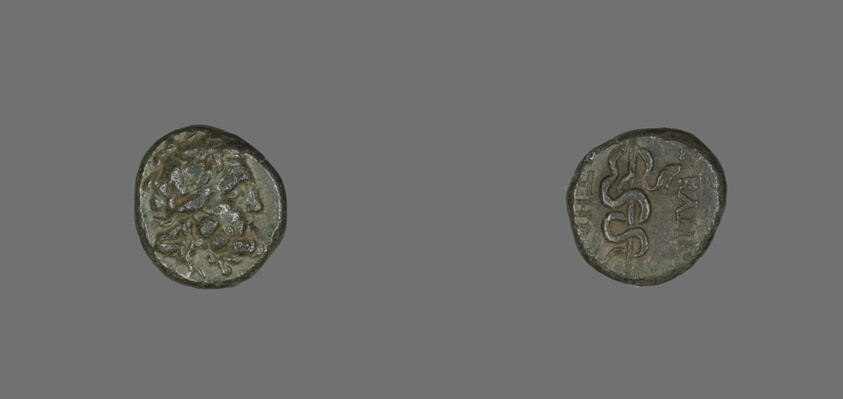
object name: Coin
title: Coin Depicting the God Asklepios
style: greek, ancient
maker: Greek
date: about 200-133 BCE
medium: Bronze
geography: Greece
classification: coin; ancient art; struck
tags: gods (deities)